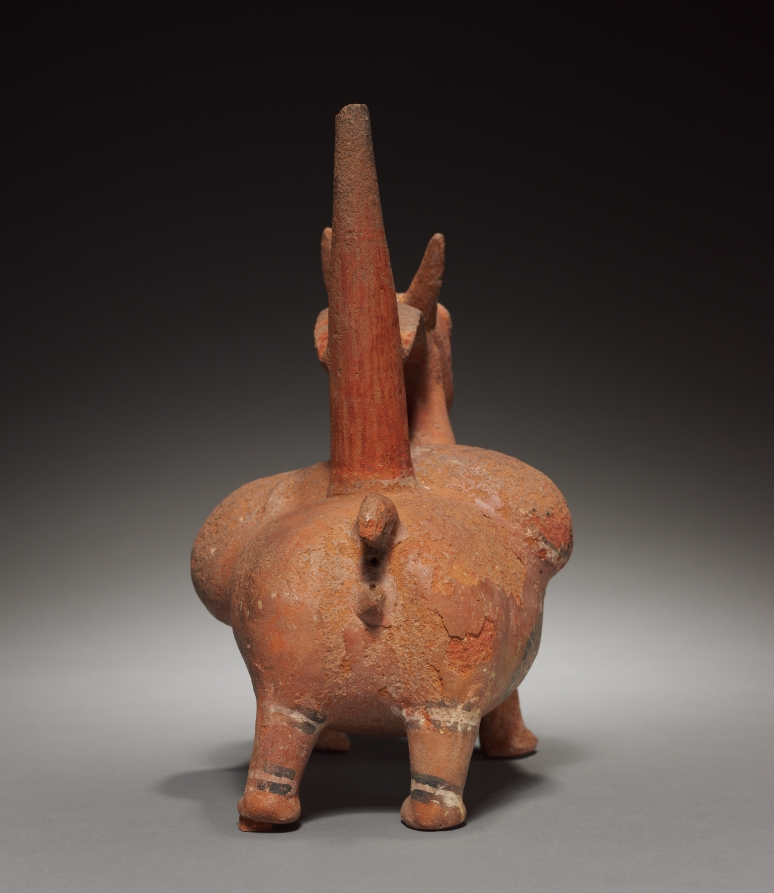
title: Llama with Packs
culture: Peru, Chimú or Inca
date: before 1532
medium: pottery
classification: Ceramic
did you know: The llama was the only burden-bearing animal, aside from humans, in ancient South America.